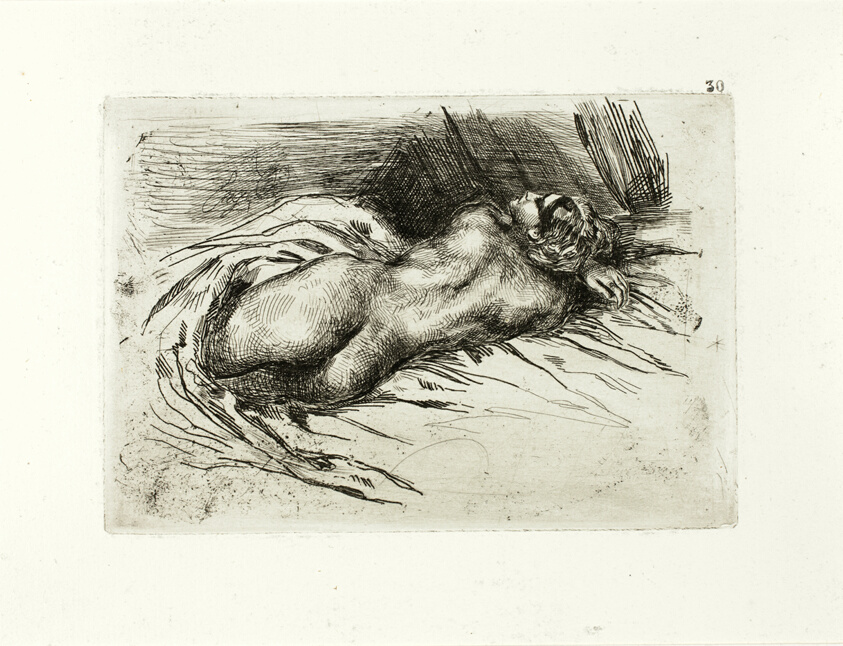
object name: Print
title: Reclining Nude, Back View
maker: Eugène Delacroix (French, 1798-1863)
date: 1833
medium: Etching in black on ivory laid paper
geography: France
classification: etching; paper; print; prints and drawing